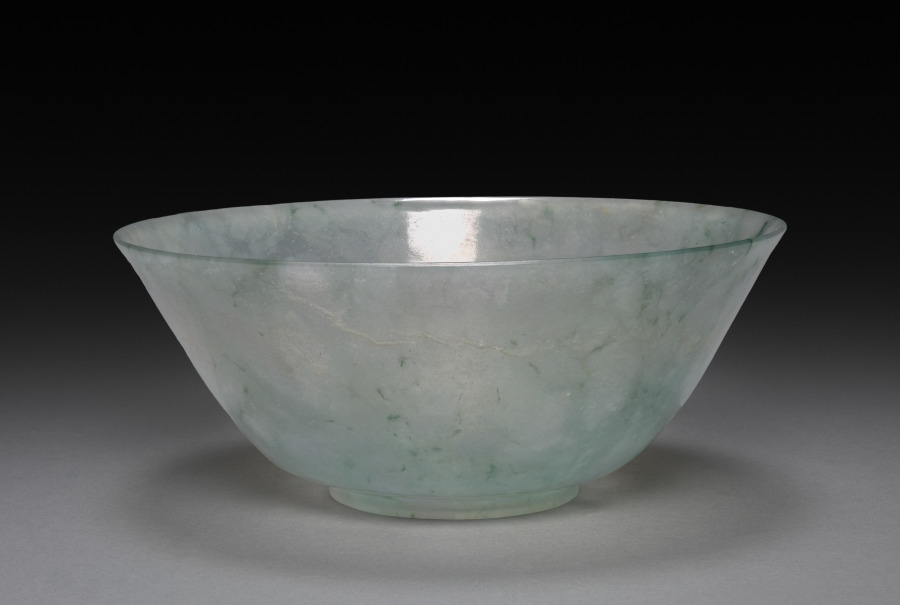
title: Bowl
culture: China, Qing dynasty (1644–1911), Qianlong mark and reign (1736–95)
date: 1736–95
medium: jade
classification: Jade